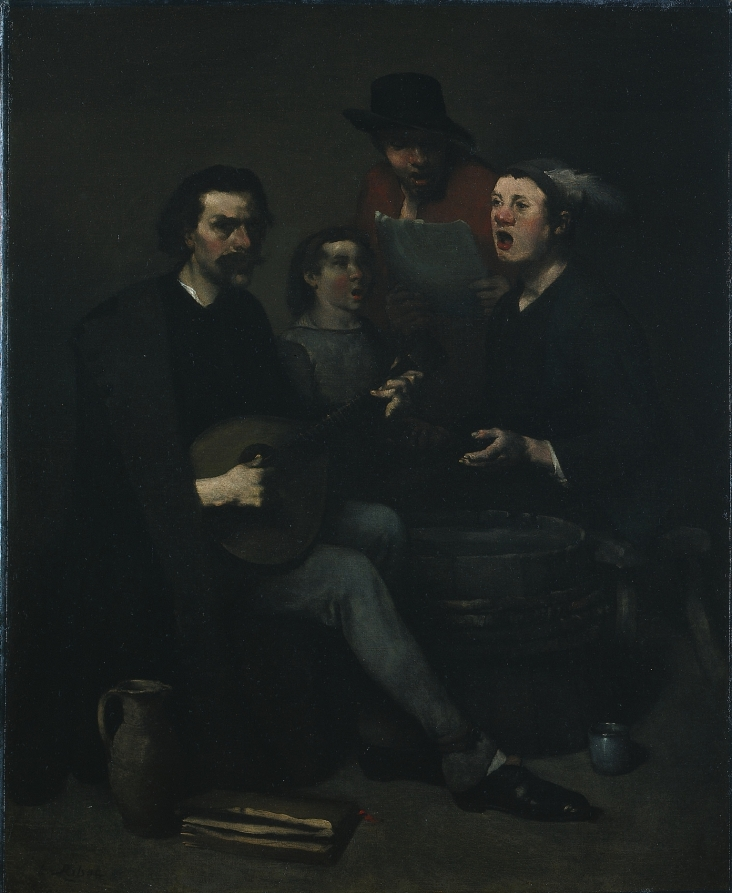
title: Singers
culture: France, 19th century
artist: Théodule Ribot (French, 1823–1891)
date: 1863–1868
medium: oil on fabric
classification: Painting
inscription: Signed lower left: t. Ribot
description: Ribot participated in a loosely defined artistic movement known as Realism, which sought to depict the gritty lives of workers and peasants. Often dark in tone and somber in mood, Realist paintings focused attention on social problems. Poor singers like these could be seen on the streets of Paris, but pictures of such singers were already a long-established theme in art history.